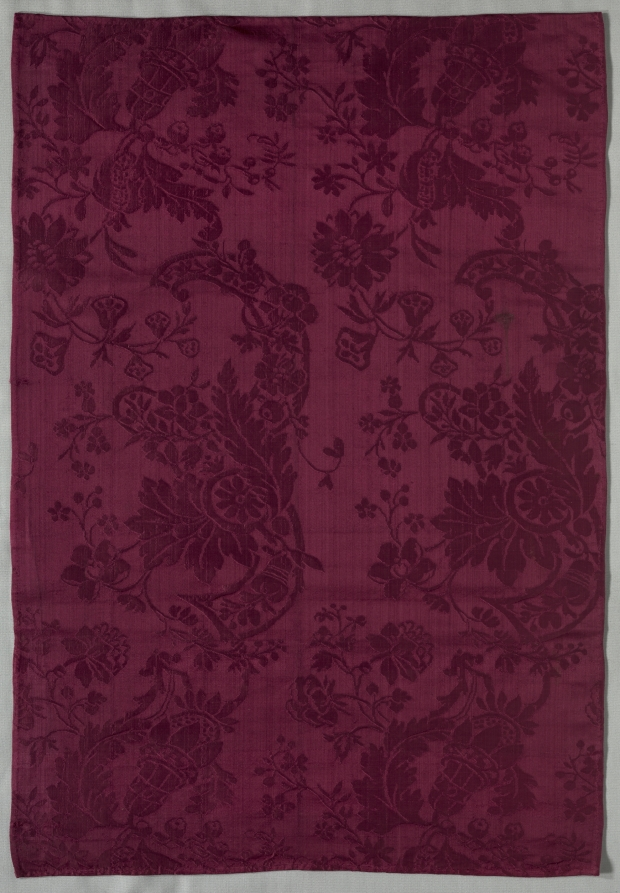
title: Length of Silk Damask Textile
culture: Italy, early 18th century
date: early 1700s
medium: damask, silk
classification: Textile